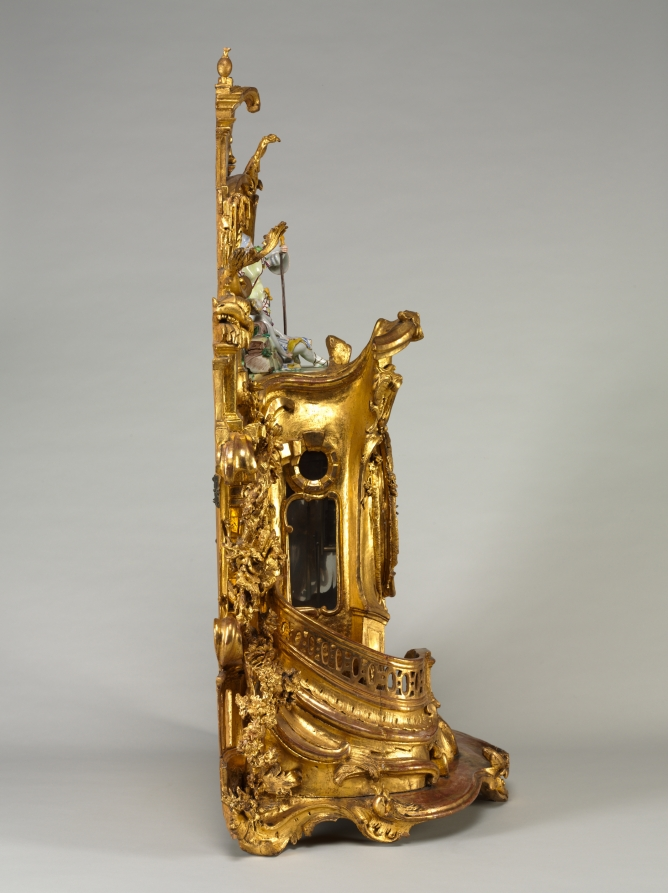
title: Clock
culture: Germany, 18th century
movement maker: Baumgartinger (German)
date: c. 1750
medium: carved and gilded wood, faience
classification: Furniture and woodwork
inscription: inscribed on face: Baumgartnger [sic] Mergentheim.